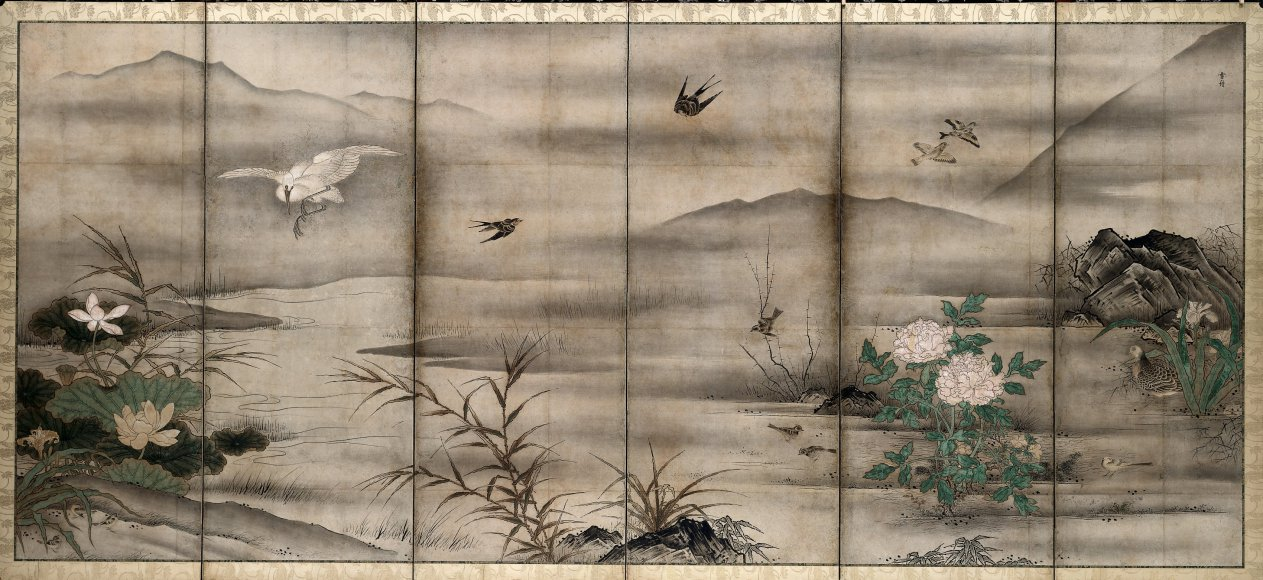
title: Birds and Flowers in a Landscape of the Four Seasons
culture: Japan, Muromachi period (1392–1573)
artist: follower of Sesshū Tōyō (Japanese, 1420–1506)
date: second half of the 1500s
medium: Six-panel folding screen, ink and color on paper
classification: Painting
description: The monk-painter Sesshū is revered today, as he was in his own time. While he left Kyoto's sophisticated intellectual and cultural environment to live in a provincial village in a far western province, he seems never to have severed contacts with the monastic communities of his young adulthood. His residence in Yamaguchi proved fortuitous because his patron, the region's military lord, enjoyed considerable freedom in conducting trade missions overseas with Korea and China. Sesshū went to China in 1467 and traveled about the country, visiting well-known historical sites and Chan (Zen) temples before returning two years later. Thus he became familiar with contemporary painting practices, materials, formats, and subject matter. His assimilation and then transmission of these elements had a profound impact on the following generations of ink painters, patrons, and Zen communities throughout Japan. Despite the presence on these byōbu of the name "Sesshū," they are from the hand of another accomplished but as yet anonymous follower active in the middle of the sixteenth century. Sesshū's name here, as on a handful of similar bird-and-flower byōbu, attests to the master's identification at that time with the colorful mural paintings on the same theme emanating from Ming dynasty China. This genre had heretofore been relegated to hanging scroll compositions, so the intro-duction into temple and daimyo residences of such an attractive theme surely caused considerable excitement in the later fifteenth century, when in all likelihood Sesshū introduced it into the Japanese painting repertoire. Subsequently, artists of varying backgrounds and training tried their hands at these large, dramatic scenes. From right to left the composition portrays an array of flowering plants in the near distance that indicate the passage of the seasons. Birds, usually paired, occupy this setting, engaged in various activities that lend naturalism and an air of peacefulness. The world they inhabit may be characterized pictorially by expansive middle-ground waterscapes that end where the far distant mountains rise as backdrops. These features appear consistently in other bird-and-flower byōbu attributed to Sesshū. Also noteworthy is the absence of any birds of prey such as the samurai's beloved hawks, emblems of fierceness and graceful strength that appear often in the byōbu of sixteenth-century Kano and Soga school painters.